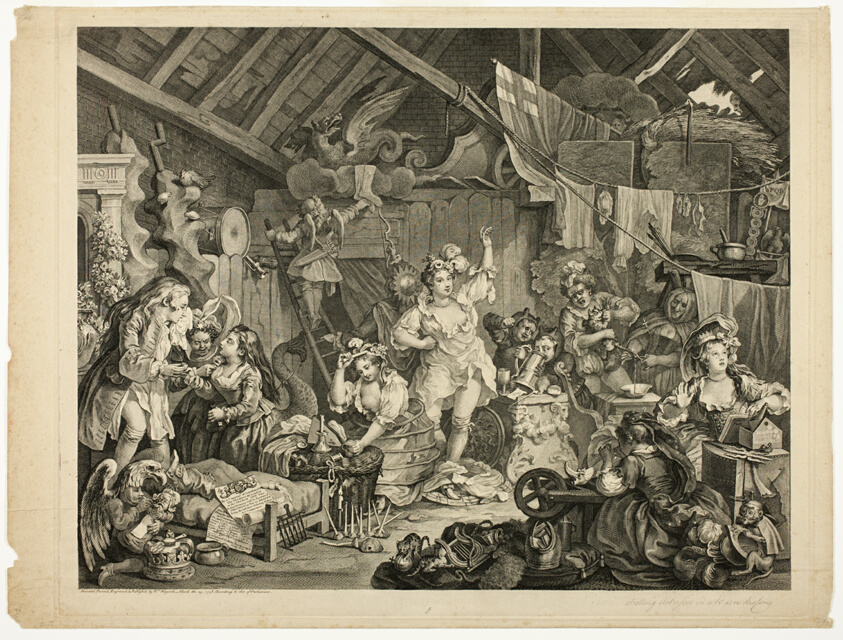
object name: Print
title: Strolling Actresses Dressing in a Barn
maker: William Hogarth (English, 1697-1764)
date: May 1738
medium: Etching and engraving in black on cream laid paper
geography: England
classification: engraving; print; prints and drawing